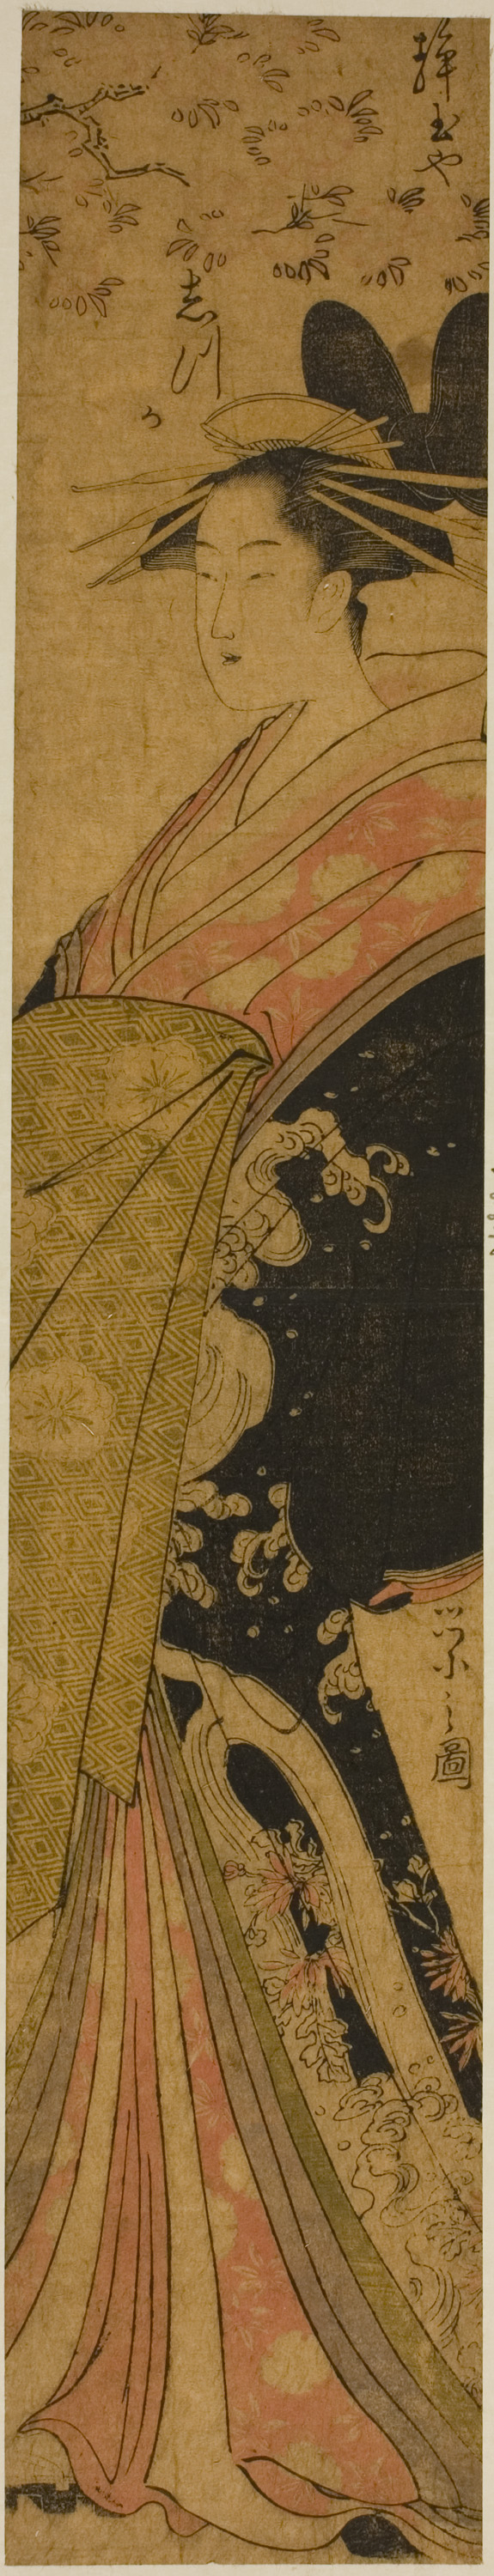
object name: Print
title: The Courtesan Shizuka of the Shizutamaya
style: Japanese (culture or style)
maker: Chobunsai Eishi; Japanese, 1756-1829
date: 1790s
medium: Color woodblock print; hashira-e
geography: Japan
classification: woodblock print; print; asian art